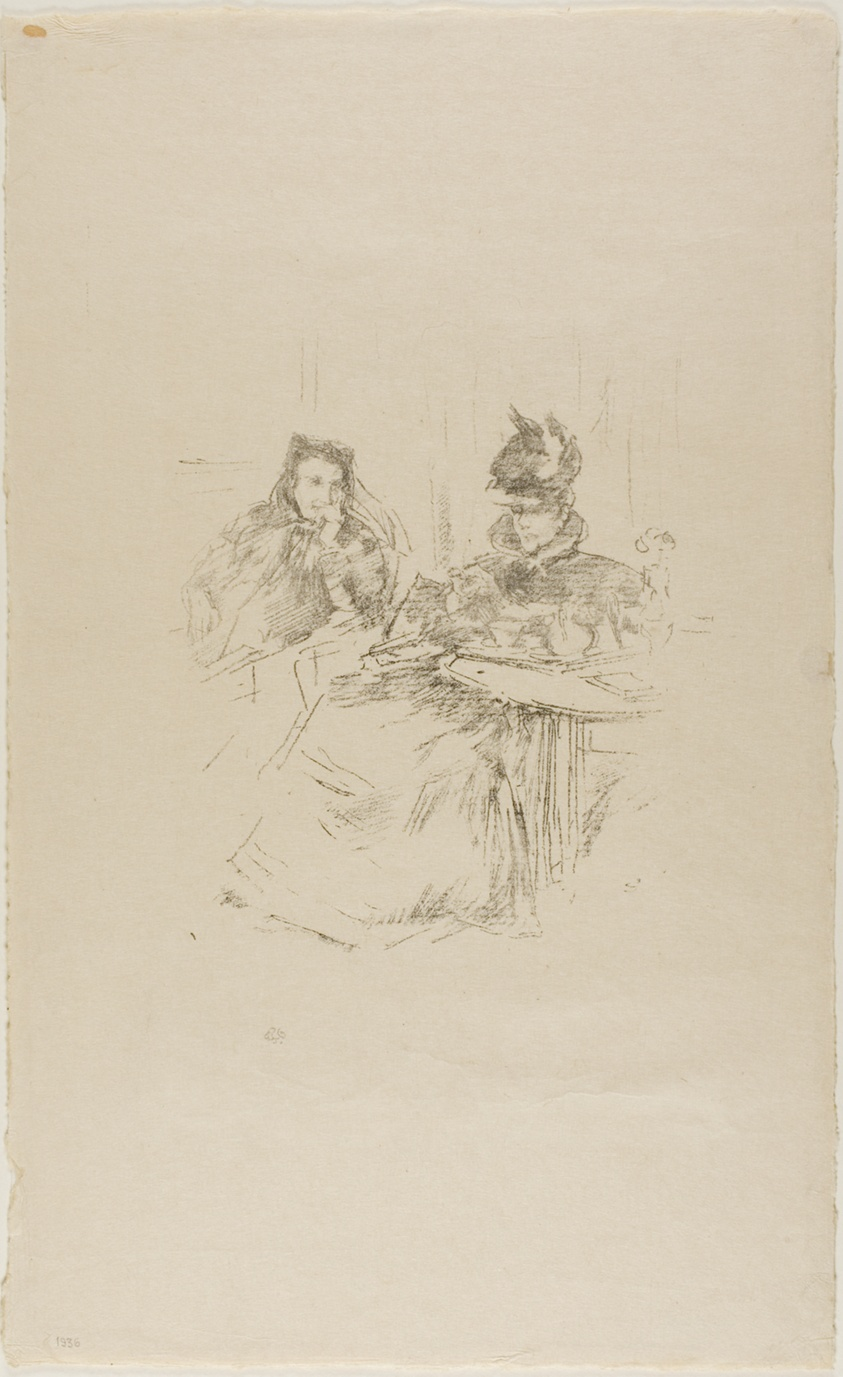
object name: Print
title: Afternoon Tea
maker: James McNeill Whistler (American, 1834-1903)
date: 1897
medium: Transfer lithograph in various black inks, on tan laid Japanese vellum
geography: United States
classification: transfer lithograph; lithograph; print; prints and drawing